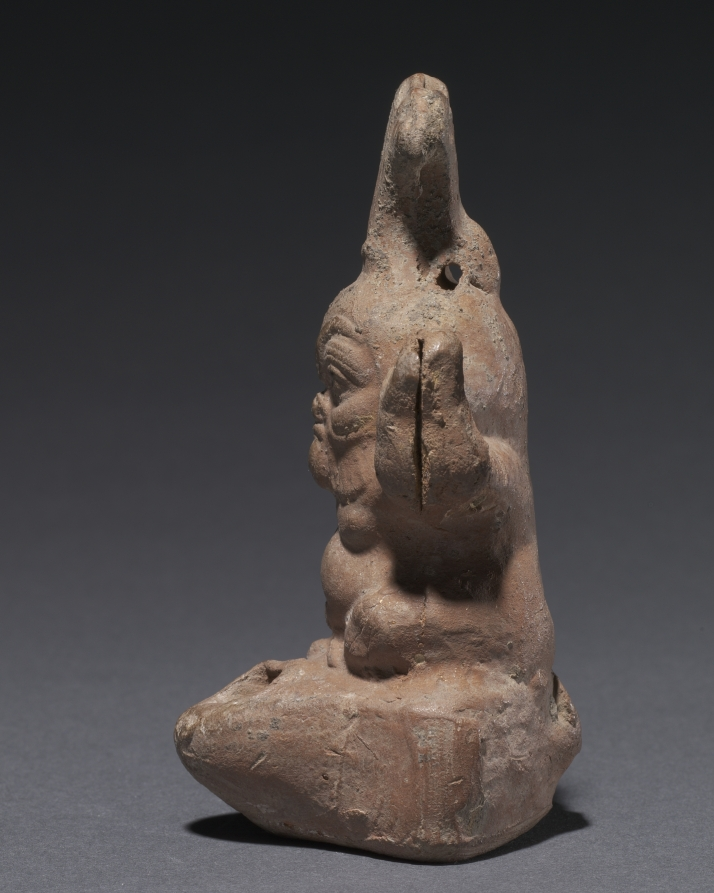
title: Bes Lamp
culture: Egypt, Greco-Roman period (332 BCE–395 CE)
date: 100 BCE–100 CE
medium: Nile silt clay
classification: Vessels